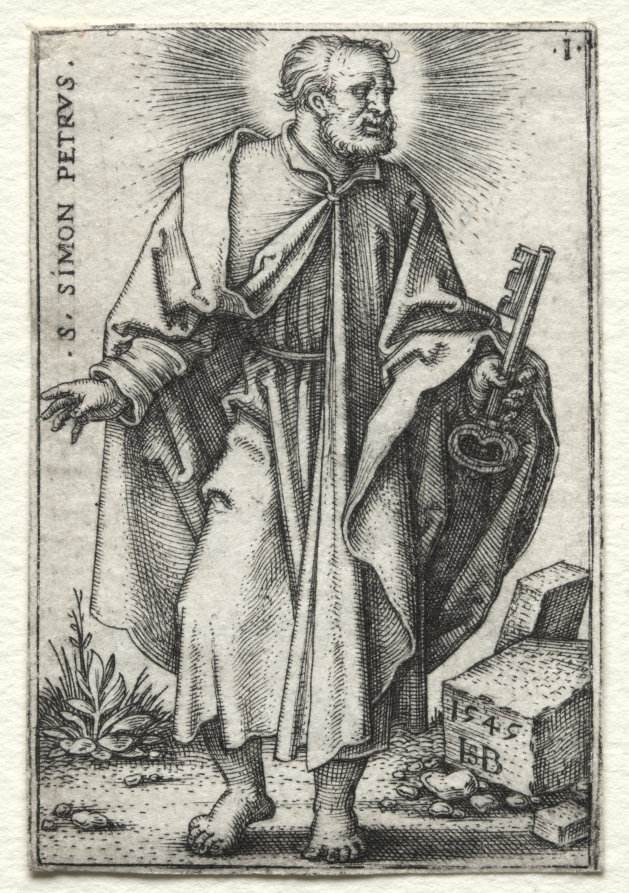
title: St. Simon Peter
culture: Germany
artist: Hans Sebald Beham (German, 1500–1550)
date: 1545–1546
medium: engraving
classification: Print